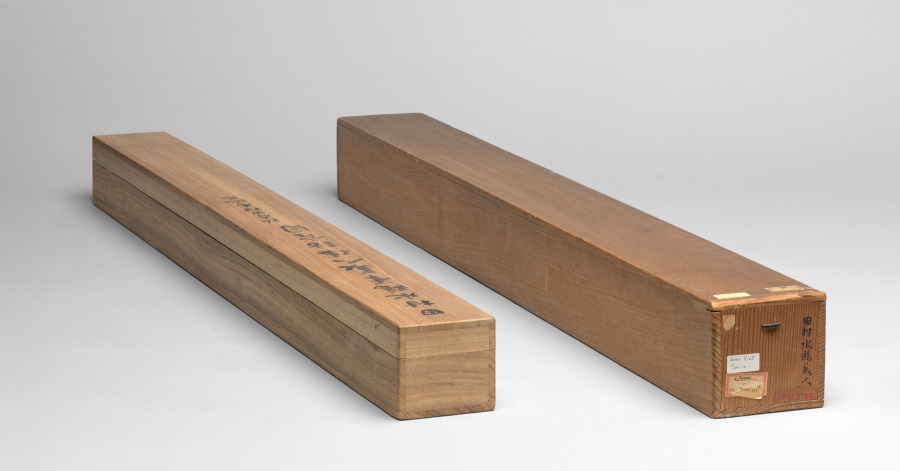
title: Beauty Receiving a Visitor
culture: Japan, Edo period (1615–1868)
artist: Tamura Suio (Japanese, active late 1600s–early 1700s)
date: late 1600s–early 1700s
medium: Hanging scroll; ink and color on silk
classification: Painting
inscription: artist's signature and seal, lower right corner.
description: Here, a person steps out to the engawa, a wood-floored corridor that runs along the outer edge of a house, to greet a visitor as the individual’s companions look on. A strong breeze blows the sleeves of their robes and the translucent blinds enclosing their sitting room. The group’s wealth and high status is signified by the two swords the visitor carries and everyone’s intricately patterned garments. A raised blind lets the viewer peek in to see a black lacquer box decorated with designs in gold powder and a ceramic incense burner on a hexagonal lacquer tray positioned carefully in the room’s display alcove, or toko.